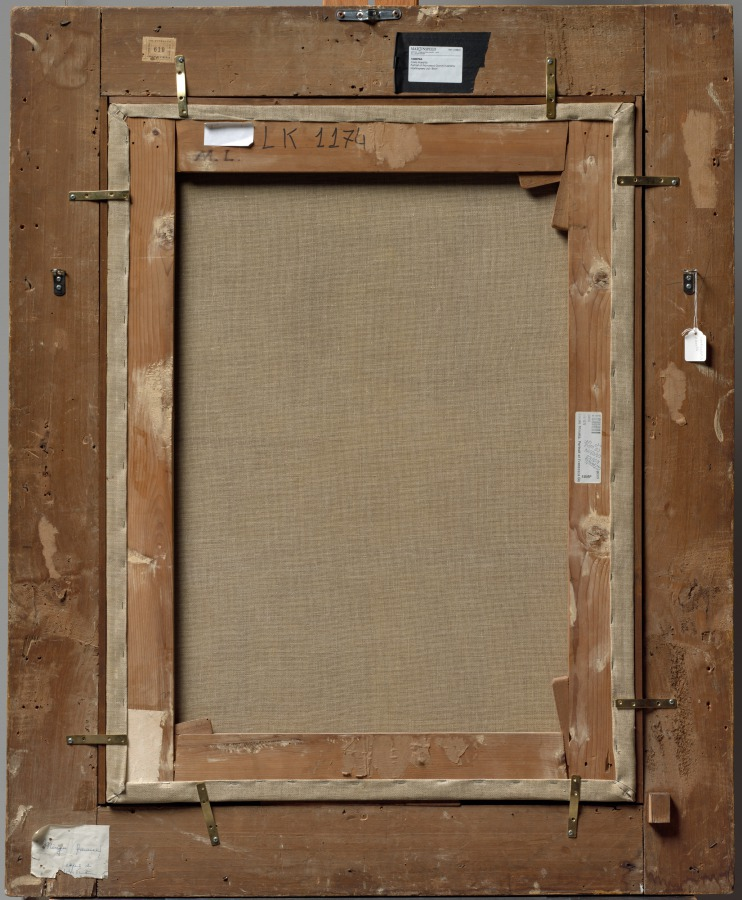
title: Portrait of Francesca Gommi Maratti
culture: Italy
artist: Carlo Maratti (Italian, 1625–1713)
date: c. 1701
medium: Oil on canvas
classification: Painting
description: In 1700 Carlo Maratti’s wife died, permitting him to marry his longtime mistress, Francesca Gommi, who began modeling for the artist in the 1670s and was the mother of his only child, Faustina. This painting was presumably painted shortly after the marriage as an homage from the artist to his new wife. To introduce an allegorical element into the composition, Maratti included a painting within a painting—in this case a drawing depicting Venus forging the love-darts of her adolescent son Cupid, suggesting that love will conquer all.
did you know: The sitter holds a drawing representing Venus making Cupid's weapons, symbolizing the power of love to conquer all.